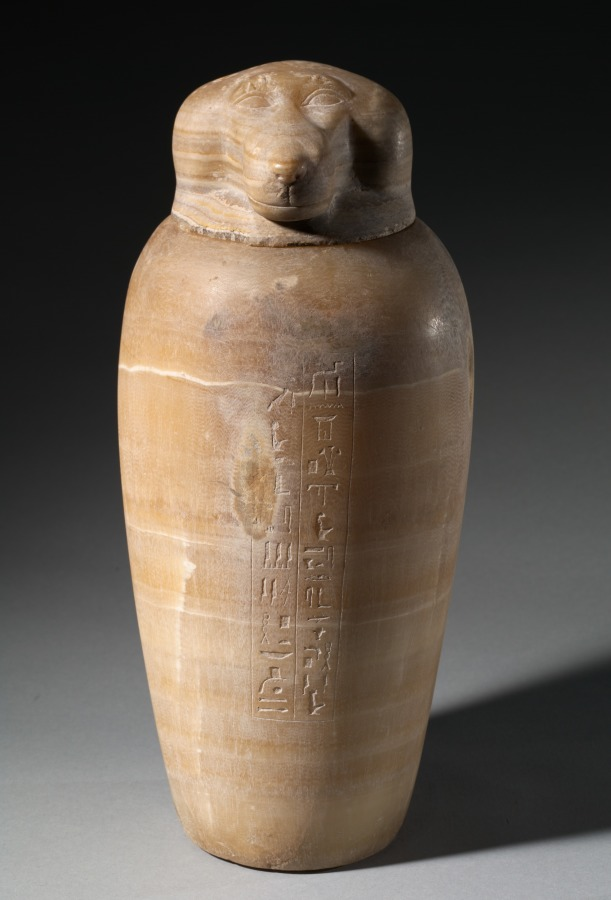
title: Canopic Jar with Baboon's Head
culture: Egypt, Late period (715–332 BCE), Dynasty 26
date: 664–525 BCE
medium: travertine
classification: Funerary Equipment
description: In the process of mummification, the liver, lungs, stomach, and intestines were removed, separately embalmed, and stored in specialized jars known as canopic jars (after a sailor in Greek mythology, who died at the town of Canopus in the Nile Delta and was worshipped there in the form of a human-headed jar). Each organ was identified with one of four funerary deities collectively known as the Sons of Horus: the liver with Imsety (man's head), the lungs with Hapy (baboon's head), the stomach with Duamutef (jackal's head), and the intestines with Qebehsenuef (falcon's head). It was their duty to protect the deceased and restore to him his body parts in the hereafter.